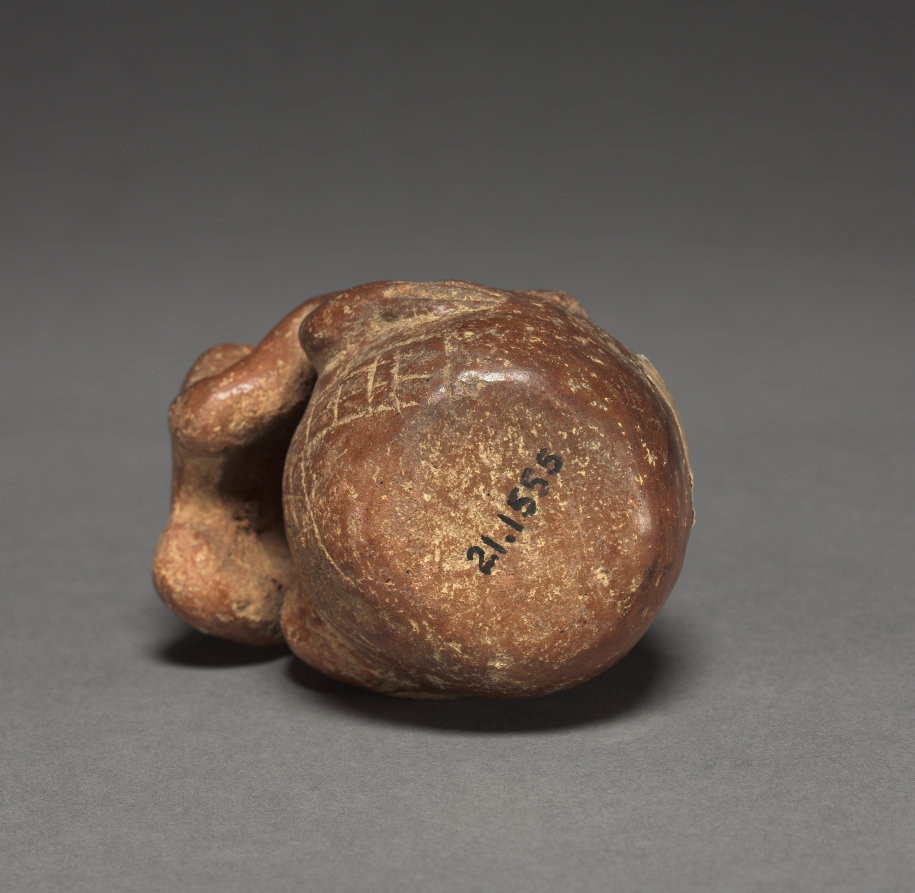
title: Jar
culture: Colombia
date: before 1921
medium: red ware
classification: Ceramic